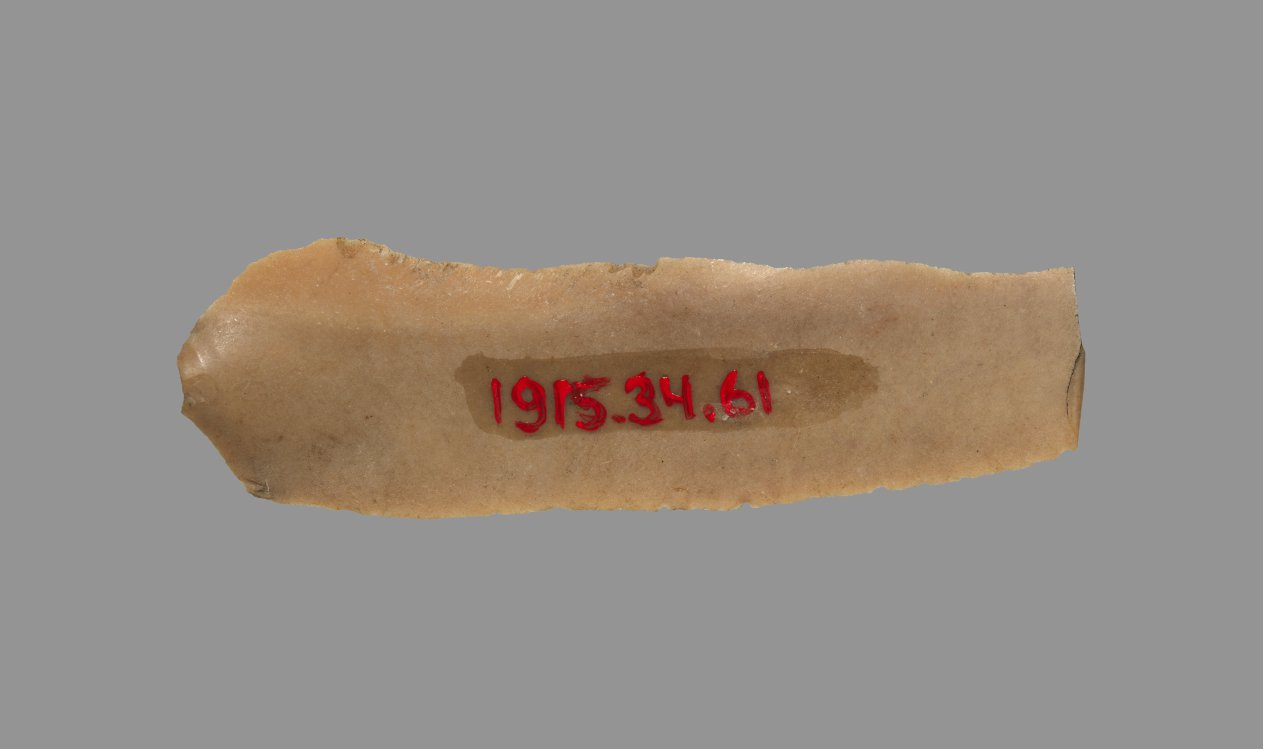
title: Sickle Blade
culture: Egypt, Middle Kingdom (2040–1648 BCE), Dynasty 12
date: 1980–1801 BCE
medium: flint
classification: Implements